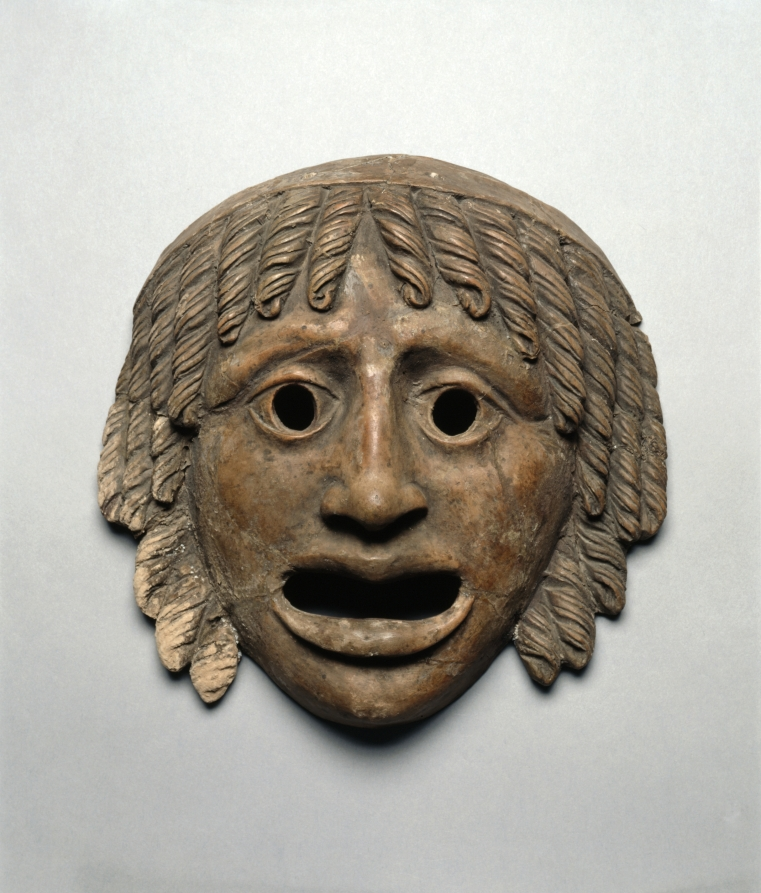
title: Mask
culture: Italy, Roman (?)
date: 1–100 CE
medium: terracotta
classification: Sculpture